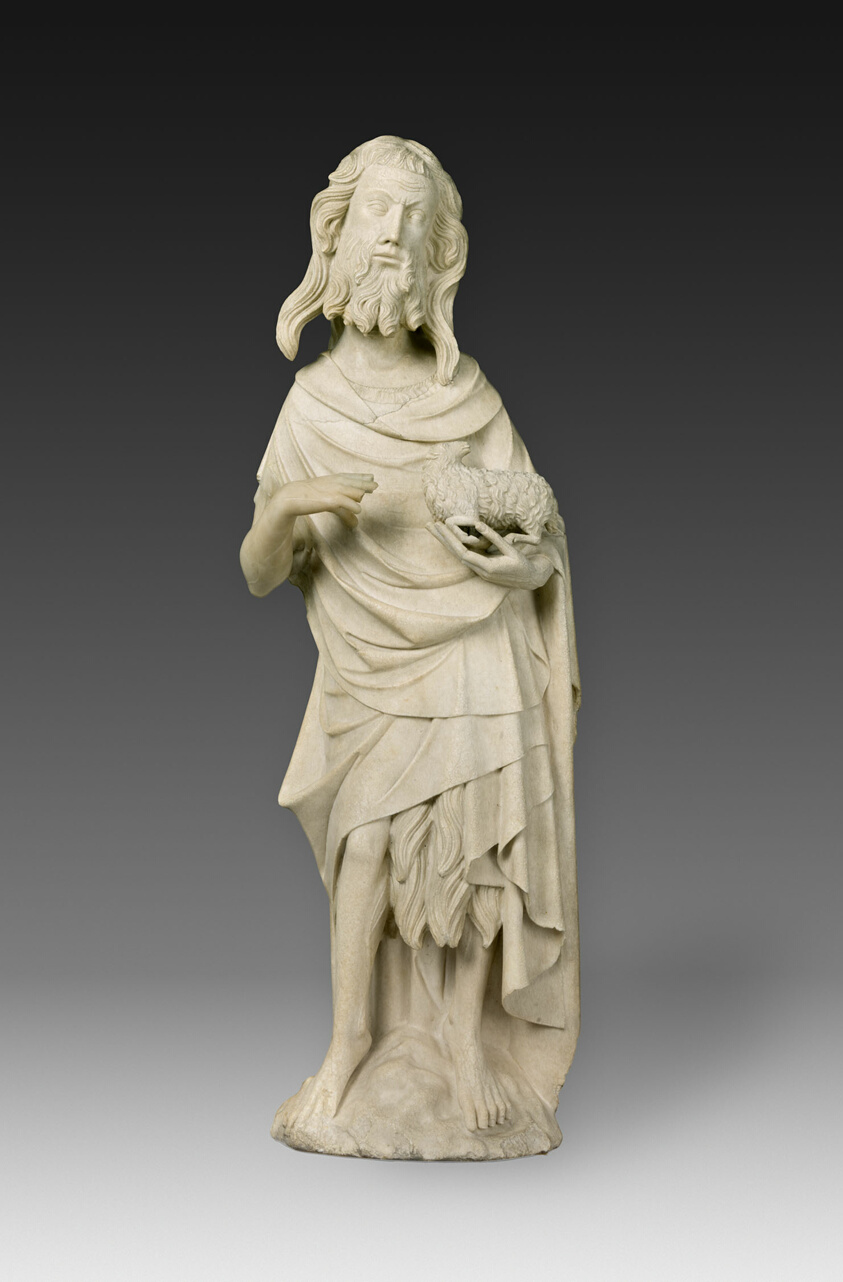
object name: Sculpture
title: Saint John the Baptist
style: Gothic (medieval), 14th century, medieval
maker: French; possibly Provence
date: 1370/80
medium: Alabaster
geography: France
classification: statuette; stone; sculpture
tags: Saint John the Baptist, sheep, sculpture, men, man, Christianity, Christian subjects, saints